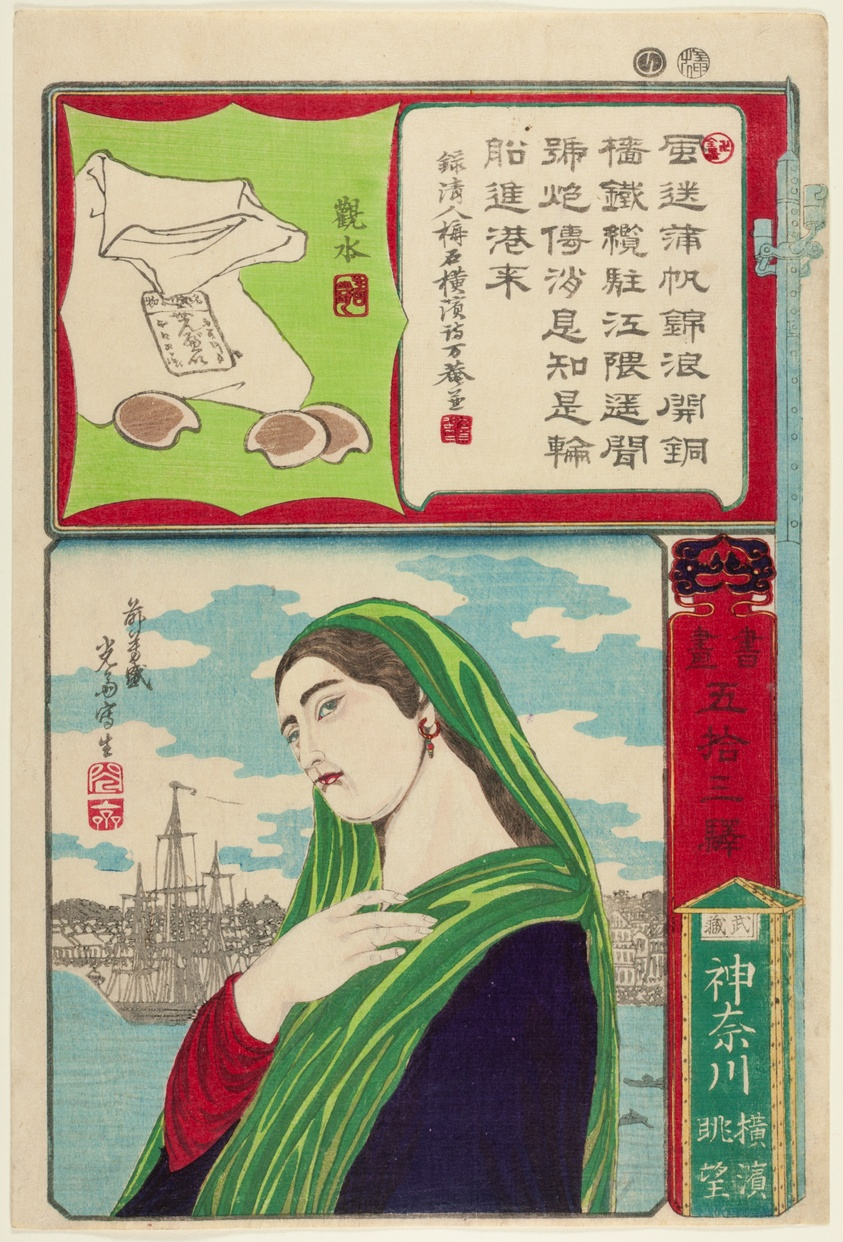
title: Kanagawa in Musashi Province: Distant View of Yokohama (Yokohama enbo), from the series Calligraphy and Pictures for the Fifty-three Stations of the Tokaido (Shoga gojusan eki)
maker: Utagawa Yoshimori (Japanese, 1830-1884)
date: 1982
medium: Woodblock print, ink and colors on paper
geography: Japan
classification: woodblock print; print; asian art